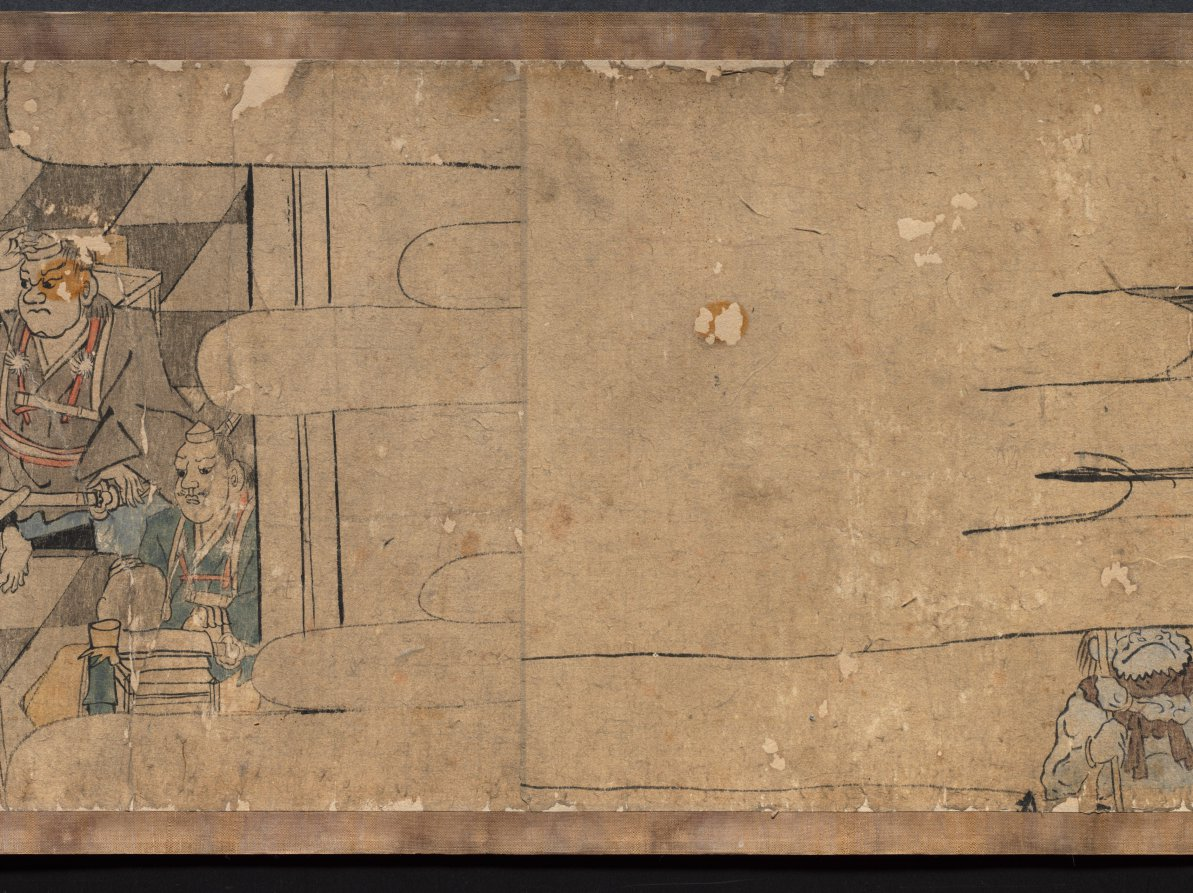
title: Oeyama Engi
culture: Japan, Edo period (1615–1868)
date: 1615–1868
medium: one of a pair of handscrolls; ink and color on paper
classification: Painting